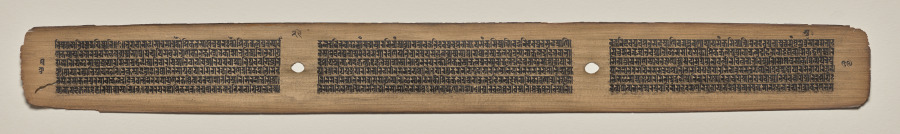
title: Text, Folio 29 (verso), from a Manuscript of the Perfection of Wisdom in Eight Thousand Lines (Ashtasahasrika Prajnaparamita-sutra)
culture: Eastern India, Bihar, Vikramashila Monastery. Painting: Nepal, Kathmandu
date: Sunday, September 14, 1119 (year 239 of the Newar Samvat in the month of Ashvina)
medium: gum tempera and ink on palm leaves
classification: Painting